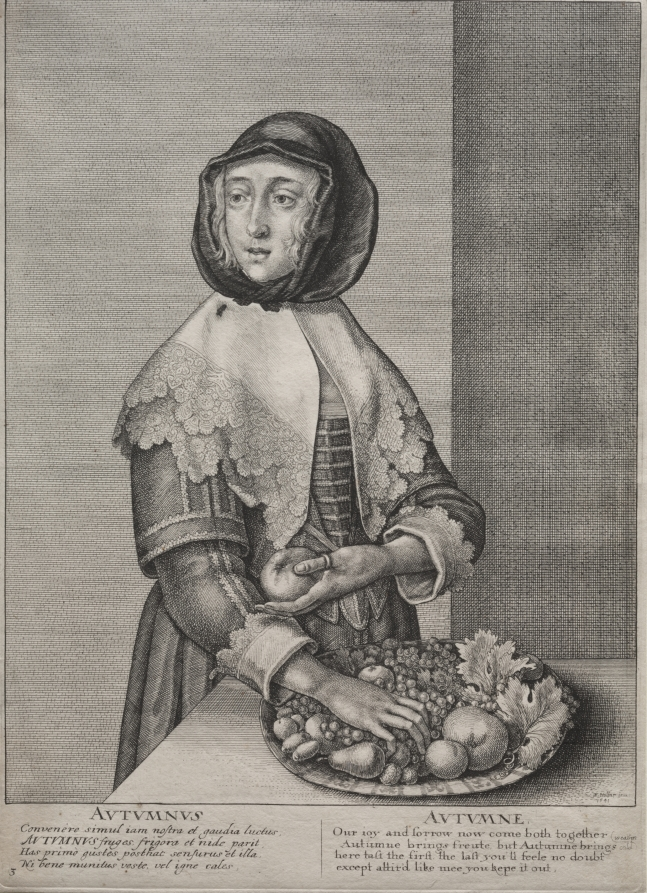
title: The Four Seasons: Autumn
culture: Bohemia, 17th century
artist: Wenceslaus Hollar (Bohemian, 1607–1677)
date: 1641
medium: etching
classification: Print